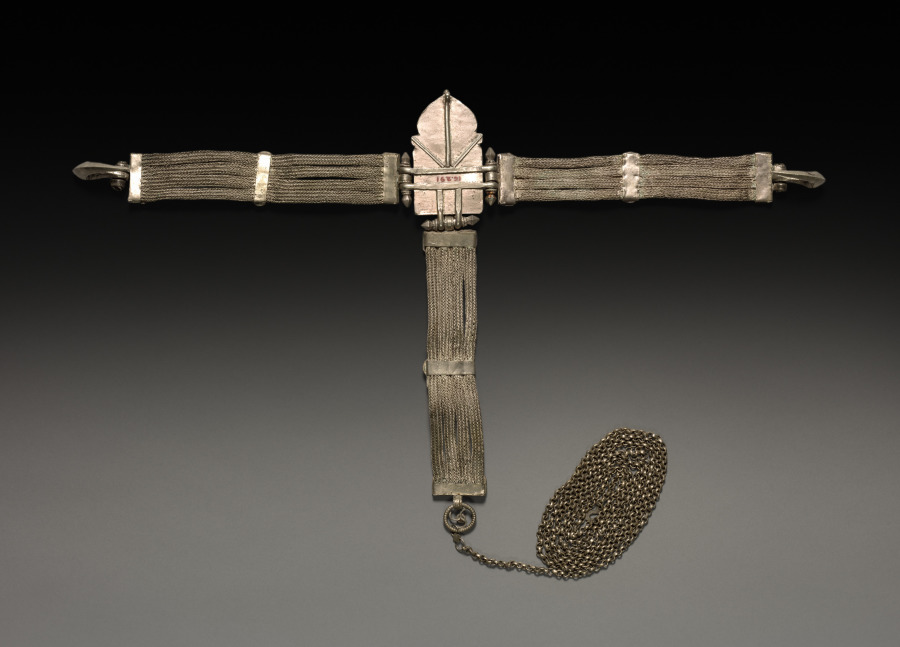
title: Girdle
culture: Tibet(?)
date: 1800s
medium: silver with turquoise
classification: Jewelry